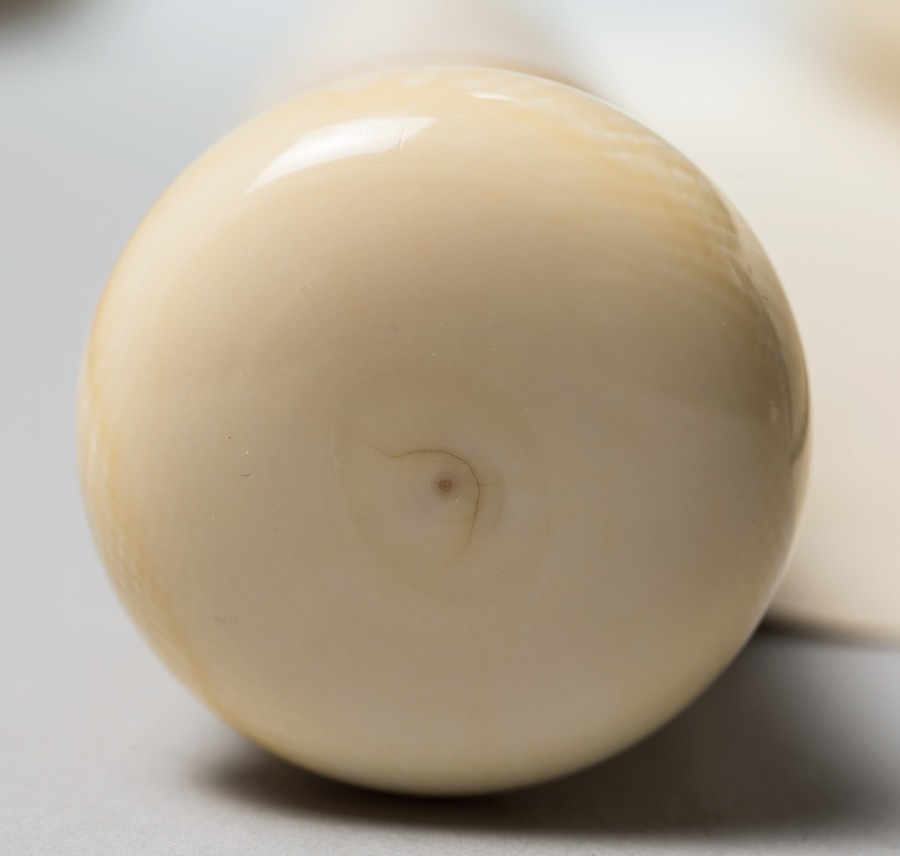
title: Thin Forest and Distant Mountains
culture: China, Ming dynasty (1368–1644)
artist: Li Liufang (Chinese, 1575–1629)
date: 1628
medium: hanging scroll, ink on paper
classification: Painting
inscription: Artist's inscription, signature, and 2 seals: Thin forest and distant mountains have always attracted me; As if they were from the brush and ink of Ni Tsan, left behind by the master in this mortal world. Now that the quiet recluse has chosen to live in the South of the City. He paints the spring breeze---over a curve of the river. In the spring day of the wu-ch'en year [1628] I made this painting and attached an old poem. Li Liu-fang [seals] Li Liu-fang-yin; Chang-heng shih. trans. WKH 1 additional seal of Chung Wen-ming (17th c.).